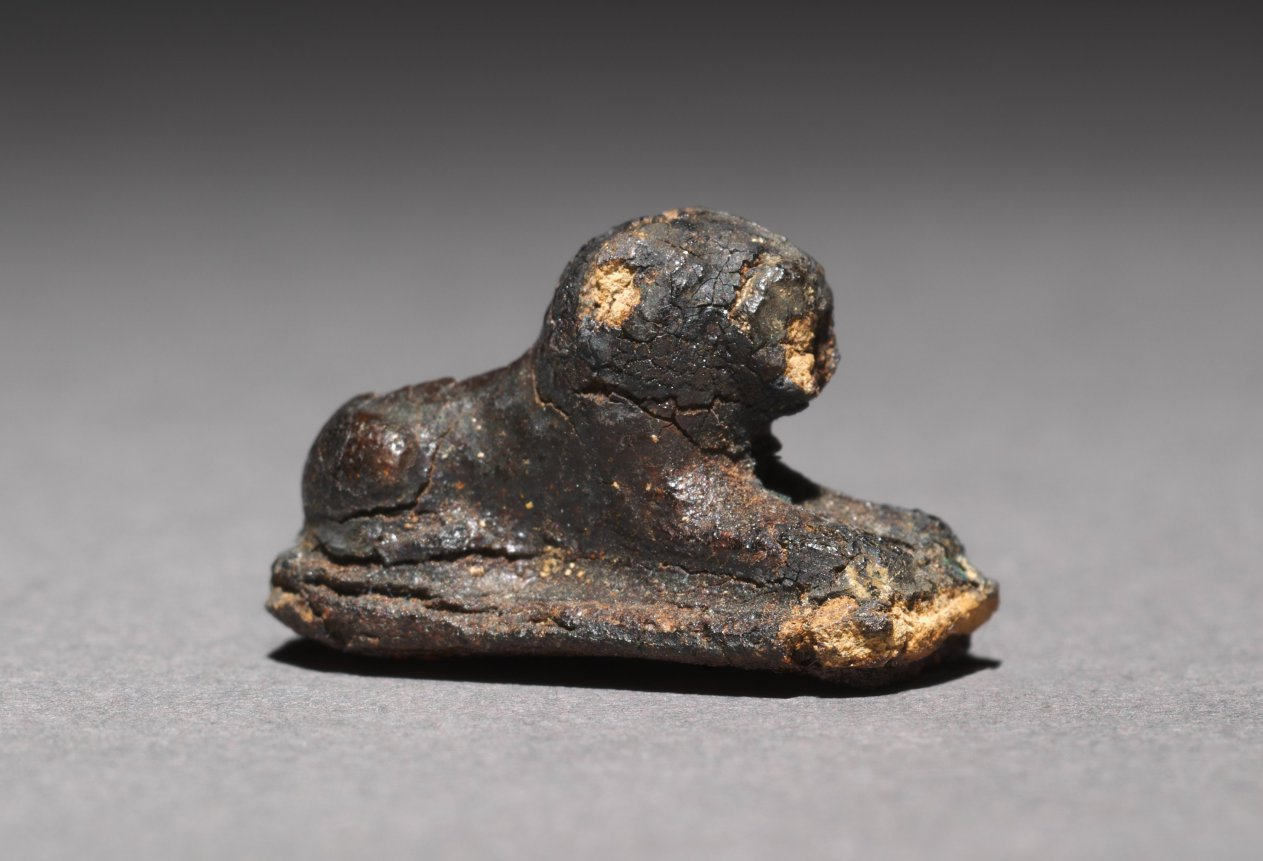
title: Recumbent Lion Bead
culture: Egypt, Middle Kingdom (2040–1648 BCE), Dynasty 12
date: 1980–1801 BCE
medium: silver foil over a clay-bulked resin core (?)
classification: Amulets